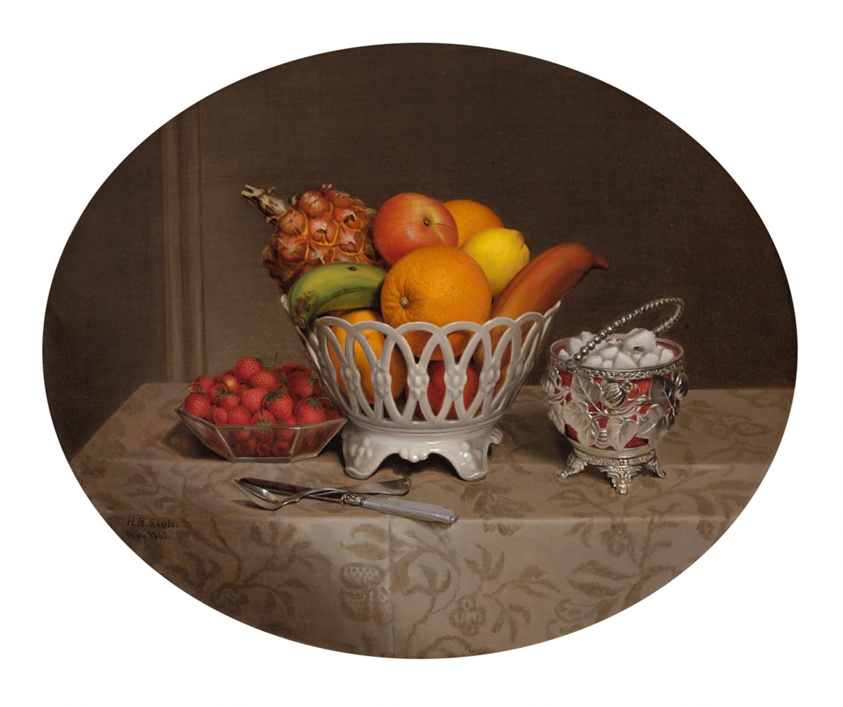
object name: Painting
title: Fruit Piece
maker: Hannah Brown Skeele (American, 1829–1901)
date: 1860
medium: Oil on canvas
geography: Saint Louis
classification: painting; american arts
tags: still life, fruit, food, dining, drinking